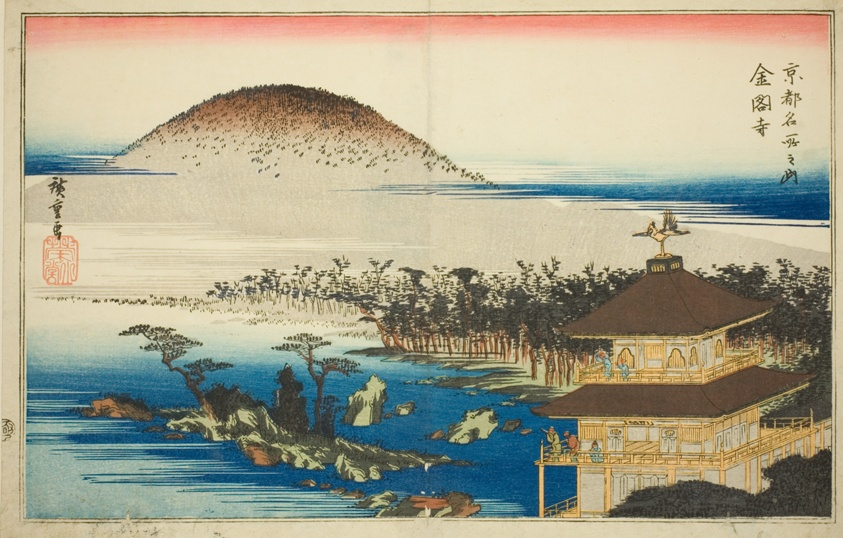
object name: Print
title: The Temple of the Golden Pavilion (Kinkakuji), from the series "Famous Places in Kyoto (Kyoto meisho no uchi)"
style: Japanese (culture or style)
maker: Utagawa Hiroshige 歌川 広重; Japanese, 1797-1858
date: c. 1834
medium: Color woodblock print; oban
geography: Japan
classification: woodblock print; print; asian art